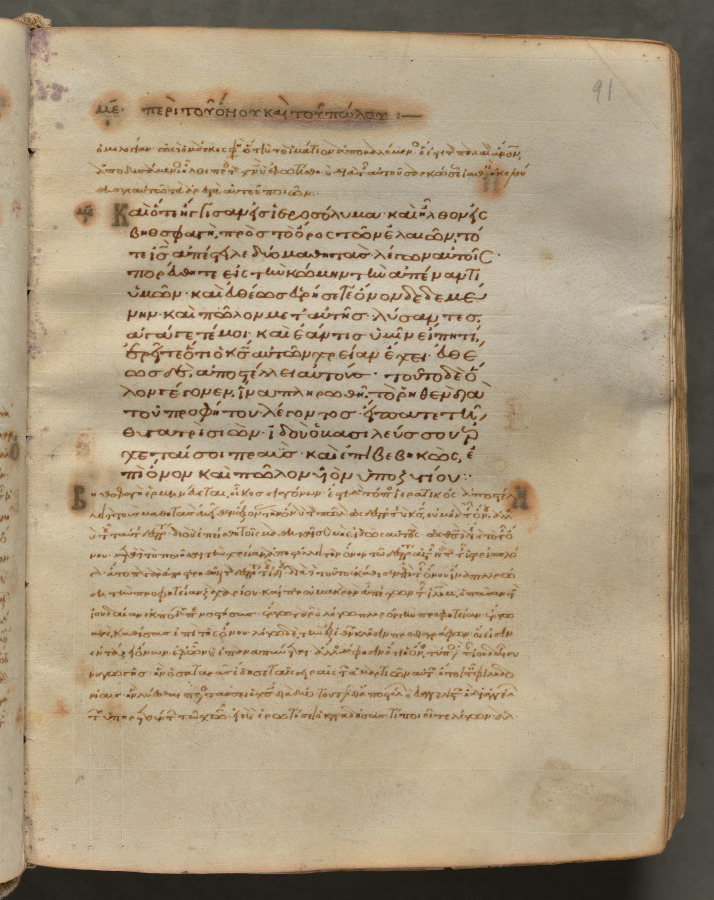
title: Text, folio 91 (recto), from a Gospel Book with Commentaries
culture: Byzantium, Constantinople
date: c. 1000–1100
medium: ink, tempera, and gold on vellum; leather binding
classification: Bound Volume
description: Each of the four gospels in this book opens on a page with brilliantly illuminated borders depicting the author of the text as well as birds-principally peacocks, symbols of the immortality of the soul-and fountains, representing the fountain of life and the salvation of the soul. This volume consists of 428 leaves with texts in Greek. Its level of sophistication suggests that it was probably written and decorated in a monastery in Constantinople.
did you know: Gospel Books were carried in procession through Byzantine churches.